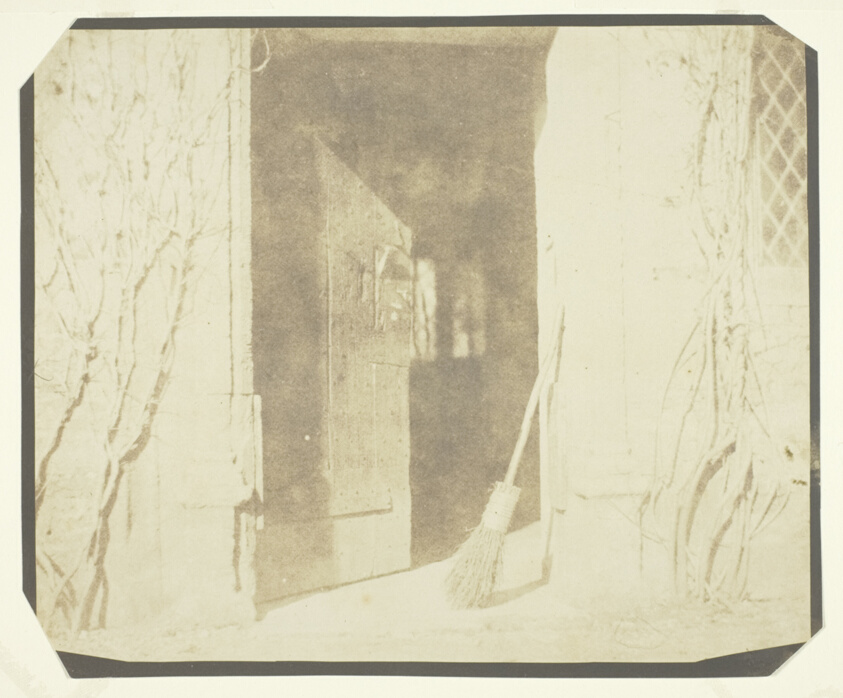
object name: Photograph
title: The Soliloquy of the Broom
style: 19th century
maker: William Henry Fox Talbot (English, 1800–1877)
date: 1843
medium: Salted paper print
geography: England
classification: salted paper print; photographic process; photography; photograph